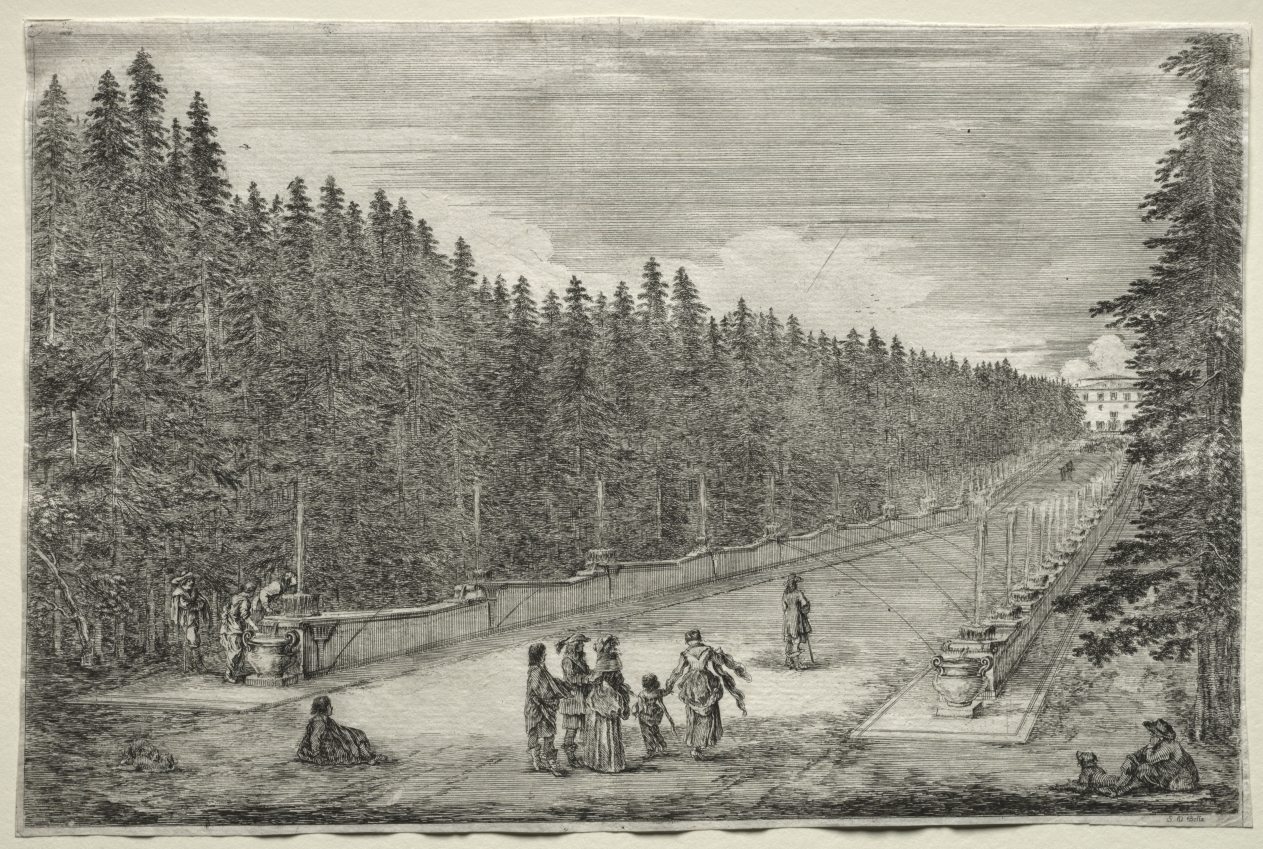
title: Views of the Villa of Pratolino: The Promenade of the Fountains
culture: Italy, 17th century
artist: Stefano Della Bella (Italian, 1610–1664)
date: c. 1653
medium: etching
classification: Print